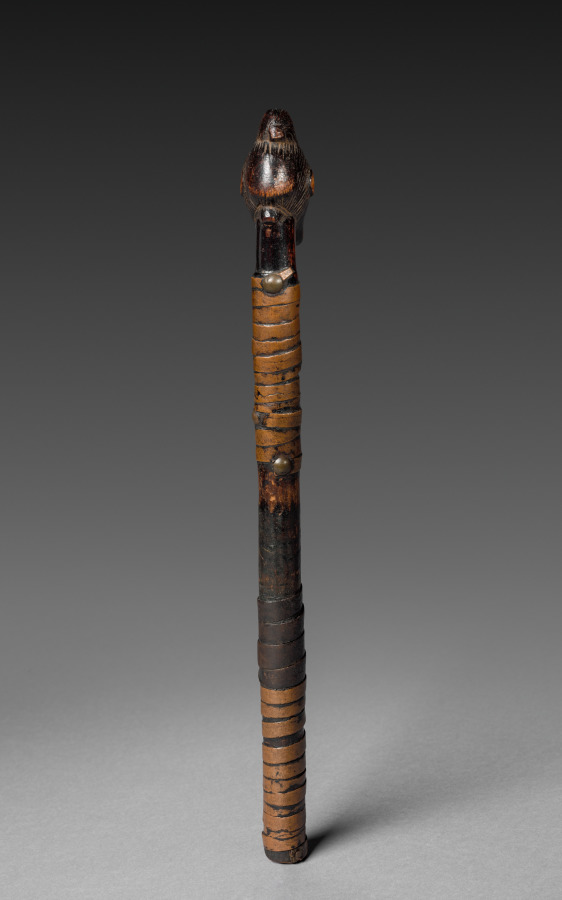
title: Fragment of a Staff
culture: Africa, Central Africa, Democratic Republic of the Congo, Kalundwe, unknown maker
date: late 1800s–early 1900s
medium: Wood, copper alloy, upholstery studs, and iron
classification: Implements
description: Though modest in scale and fragmentary in that its blade is missing, this is perhaps one of the finest surviving examples of a sculptural object in the little-known style of the Kalundwe people. It represents a poorly documented culture's artistic style that sits between the Songye to the west and the Luba to the east. Showing surface traces of continuous manipulation, the shaft of this short staff is entirely wrapped with a copper sheet, a common feature of rank emblems. Originally, it would have had an iron blade projecting from its mouth. However, rather than serving as a functional tool for carving, it would be hung over the shoulder to signal the high rank of its owner, be it a chief, another dignitary, or even a sculptor.